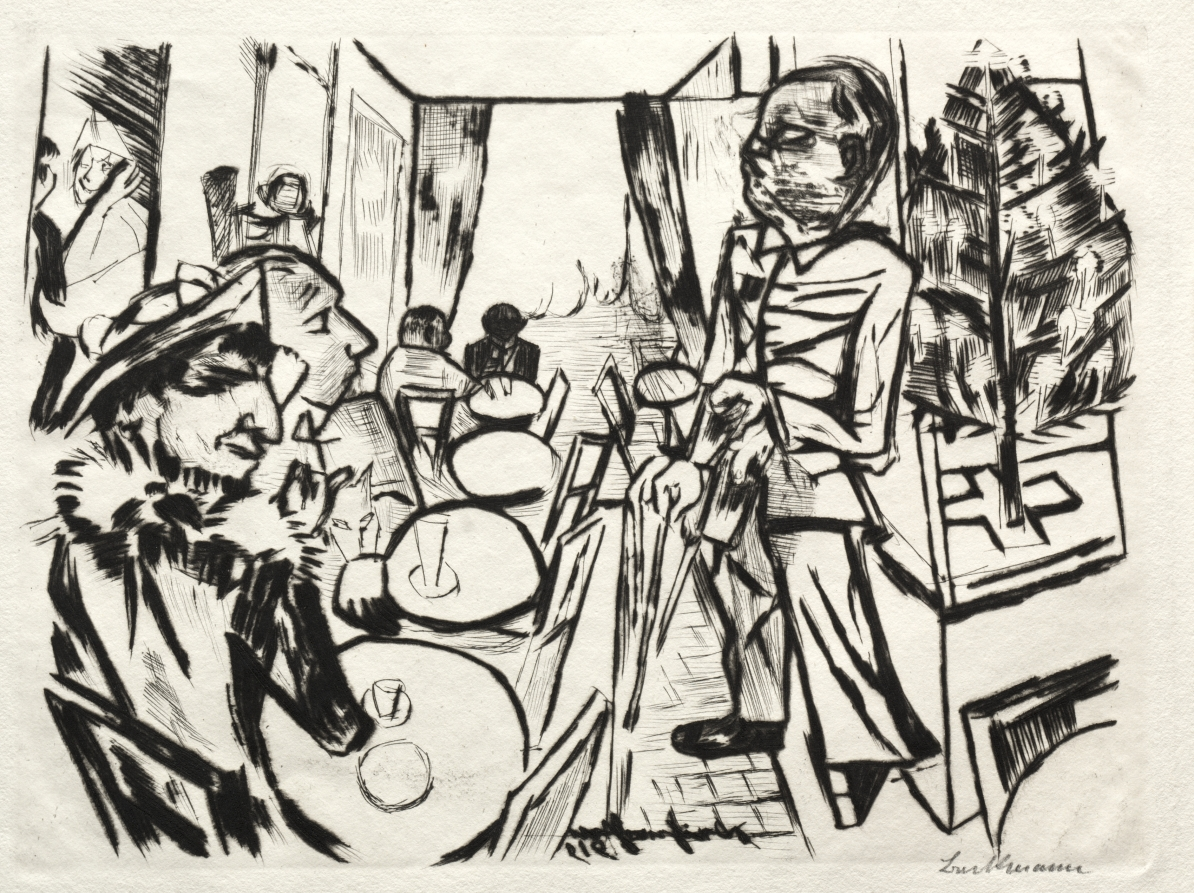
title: Christmas 1919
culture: Germany, 20th century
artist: Max Beckmann (German, 1884–1950)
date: 1919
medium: drypoint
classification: Print